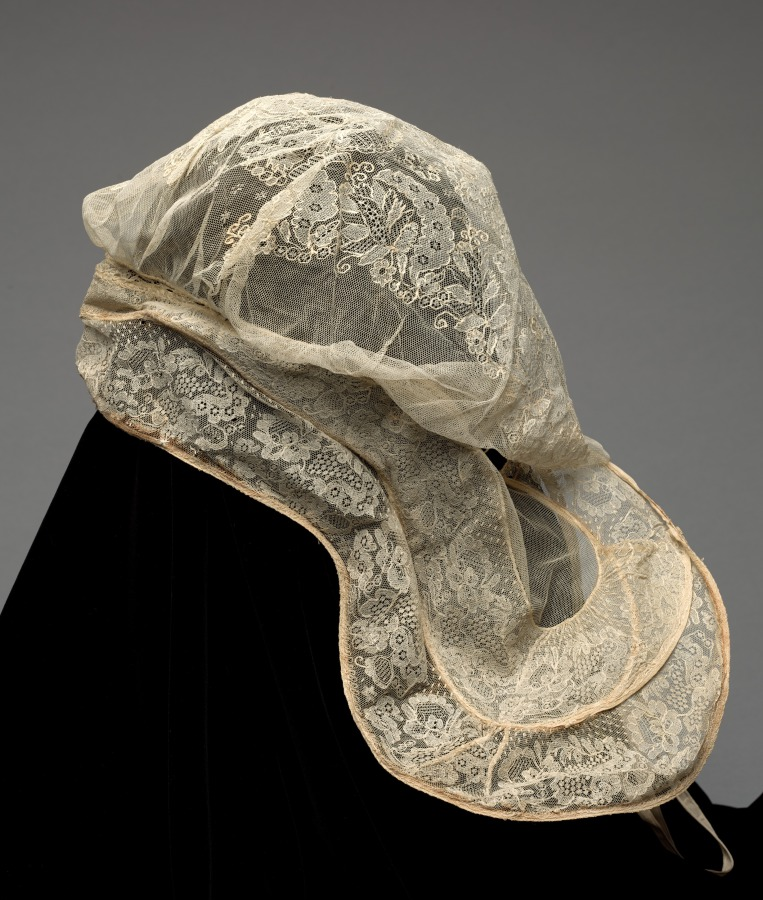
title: Lace Cap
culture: Netherlands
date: 1800s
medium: Net lace, embroidered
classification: Garment